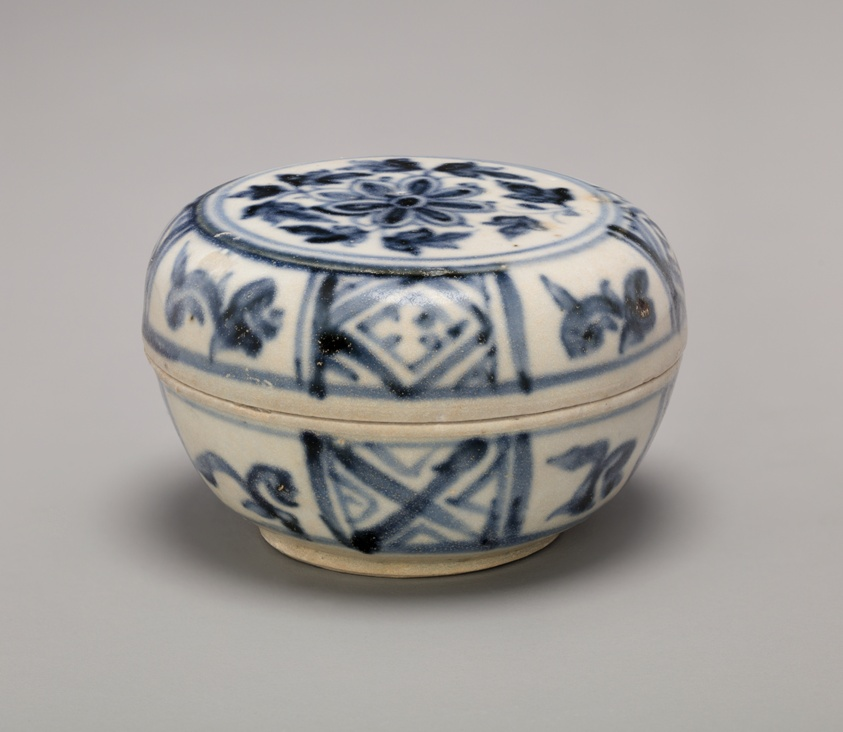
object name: Vessel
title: Miniature Covered Box with Chrysanthemum Spray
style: annamese, vietnamese, Southeast Asian, asian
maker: Vietnam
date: 15th century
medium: Glazed stoneware with cobalt-blue underglaze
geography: Vietnam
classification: ceramics; asian art; vessel